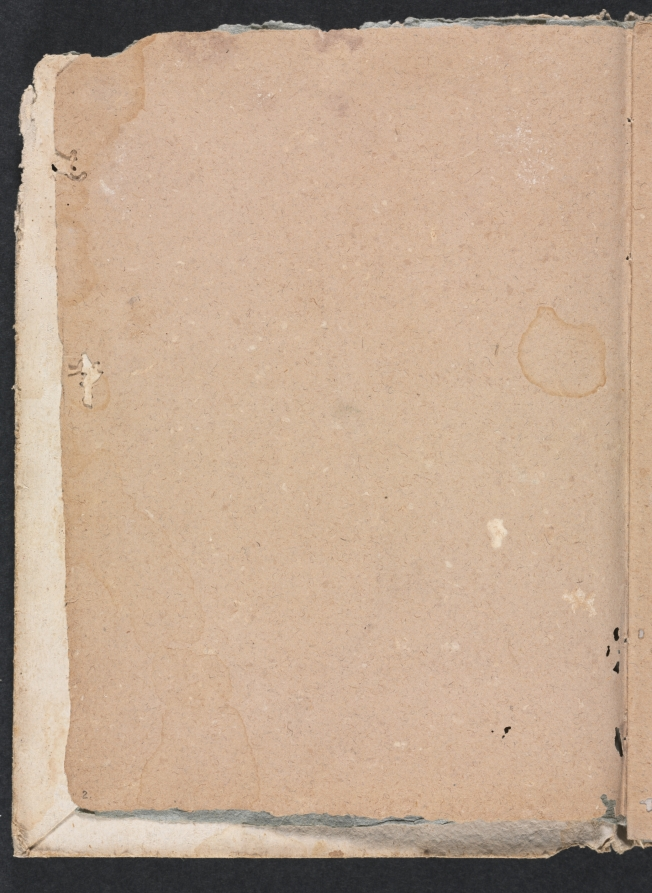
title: Verona Sketchbook: (page 2)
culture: Italy, 18th century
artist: Francesco Lorenzi (Italian, 1723–1787)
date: 1760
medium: paper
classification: Bound Volume